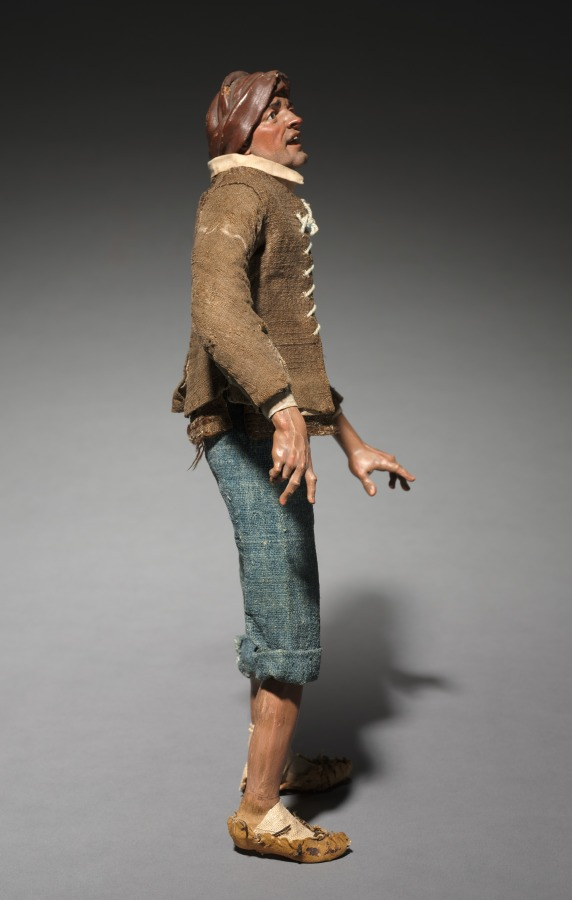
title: Figure from a Crèche: Shepherd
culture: Italy, Naples, late 18th-early 19th century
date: 1780–1830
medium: painted wood and terracotta with various textiles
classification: Sculpture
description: The practice of creating scenes of the Nativity for the home dates from the early 1700s in Italy, where people began to set up doll-like figures of about a foot or less in height. The custom was particularly popular in Naples around 1800, where crèche scenes (crèche means cradle, or crib) included many figures, whose heads and hands of painted terracotta, stuffed cloth bodies, and clothing adapted from contemporary local costumes gave them an amazingly realistic character. Representations of the birth of Jesus can be traced to the first few centuries of Christianity. Both living creatures and sculptural depictions of them were used from early times. By the late middle ages it was customary to create life-size figures of wood or stone, naturalistically painted, to represent the characters who participated in the events of Jesus's early life. These sculptures were then arranged in scenes illustrating one or both of the most important of these events, the Adoration of the Shepherds and the Adoration of the Magi-the three kings from the East who came to pay homage to the Christ child. Used in churches, these large figures were especially popular in Italy, Central Europe, Spain, and Portugal.